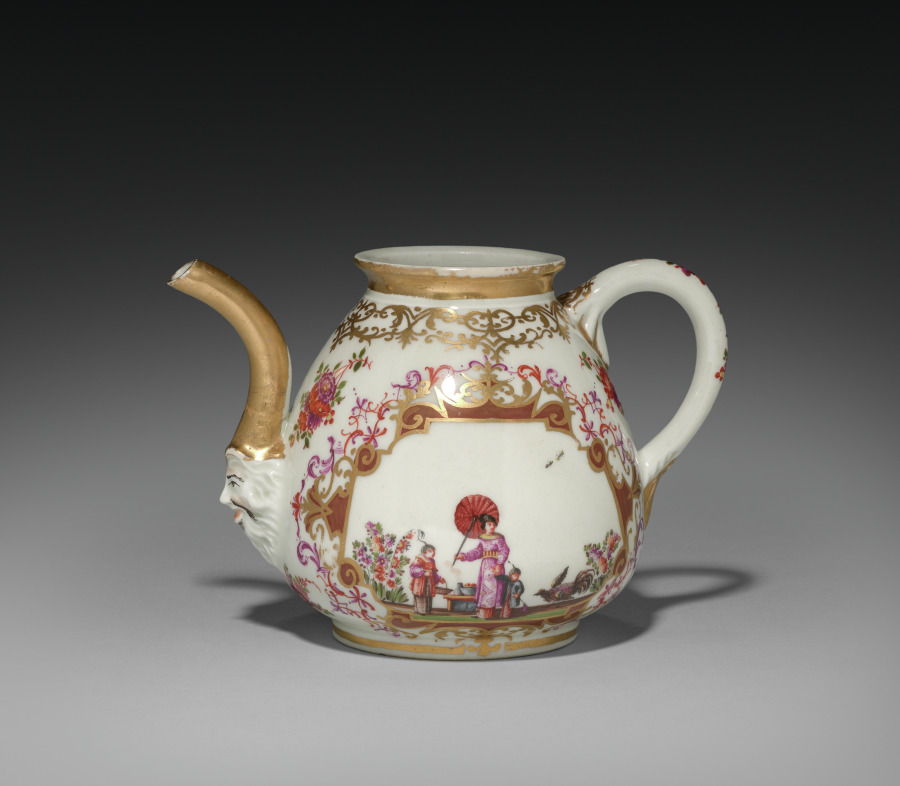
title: Tea Pot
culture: Germany, Meissen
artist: Meissen Porcelain Factory (German, est. c. 1710)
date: c. 1723–24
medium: gilt porcelain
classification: Ceramic